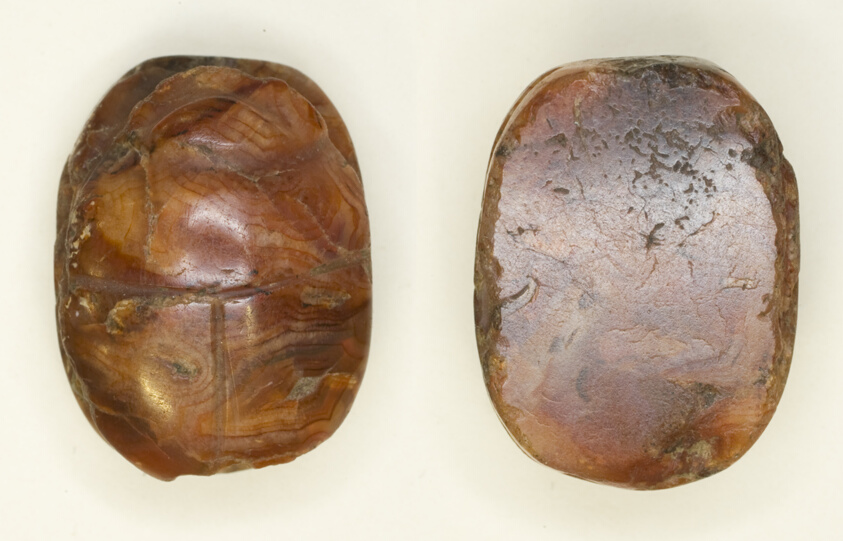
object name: Costume and Accessories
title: Scarab: Uninscribed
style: egyptian, third intermediate period, second intermediate period, new kingdom, late period (egyptian), ancient, middle kingdom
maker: Egyptian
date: Middle Kingdom–Late Period, Dynasties 12–26 (about 1985–525 BCE)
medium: Agate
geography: Egypt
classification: scarab; stone; ancient art; costume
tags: scarab beetle